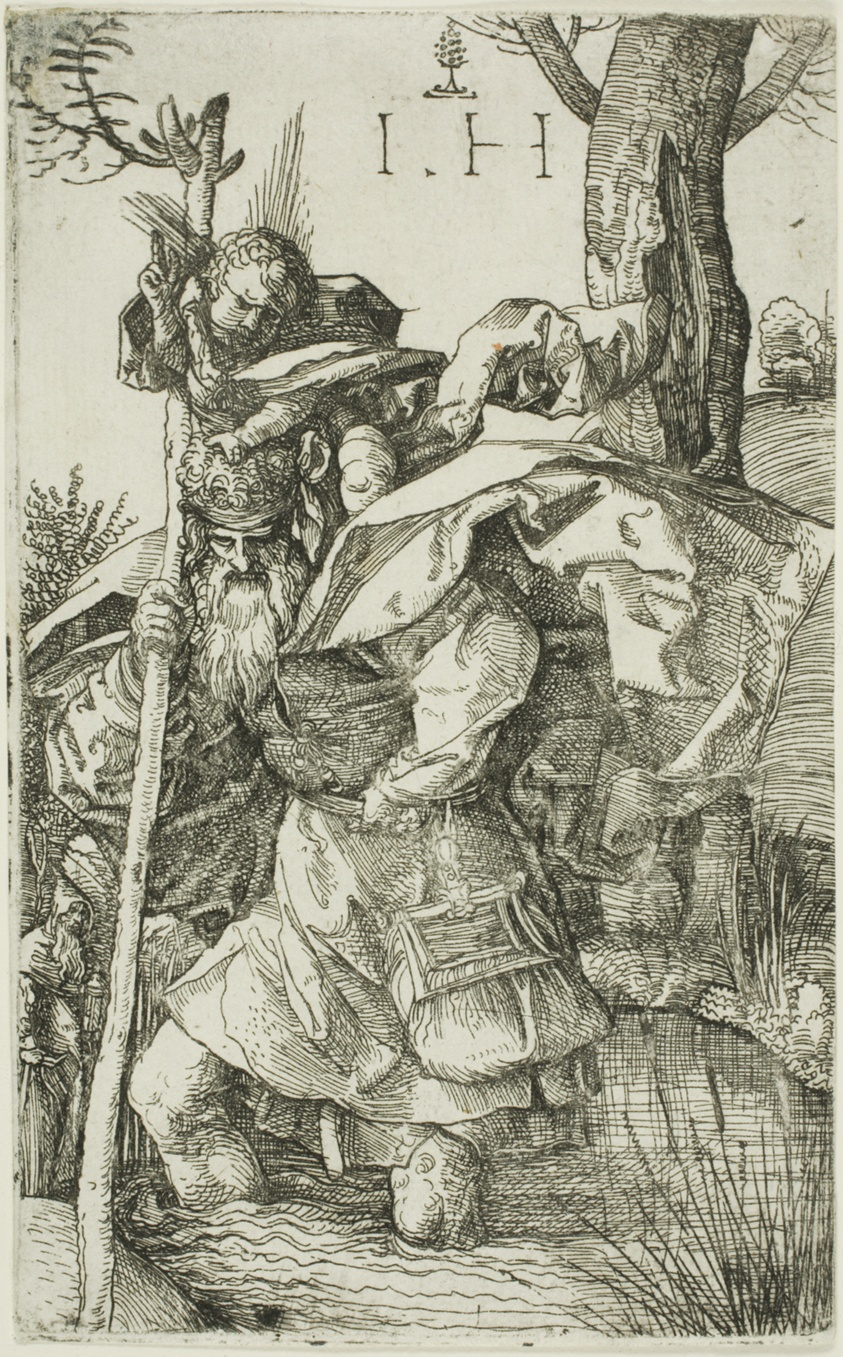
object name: Print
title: Saint Christopher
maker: Hieronymous Hopfer (German, active 1520-1550)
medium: Etching in black on paper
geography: Germany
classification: etching; print; prints and drawing